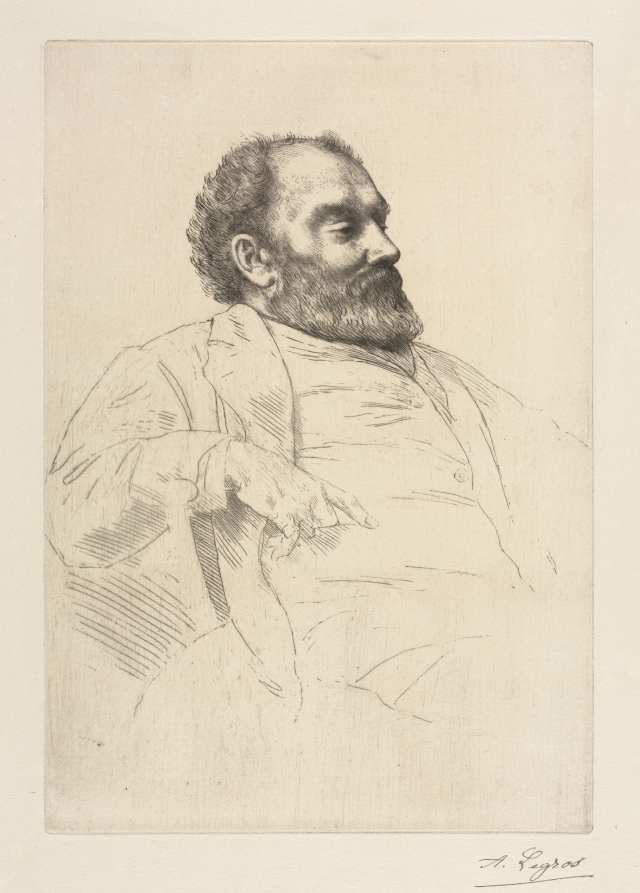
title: Val Prinsep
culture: France, 19th century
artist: Alphonse Legros (French, 1837–1911)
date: c. 1857–1911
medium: drypoint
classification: Print